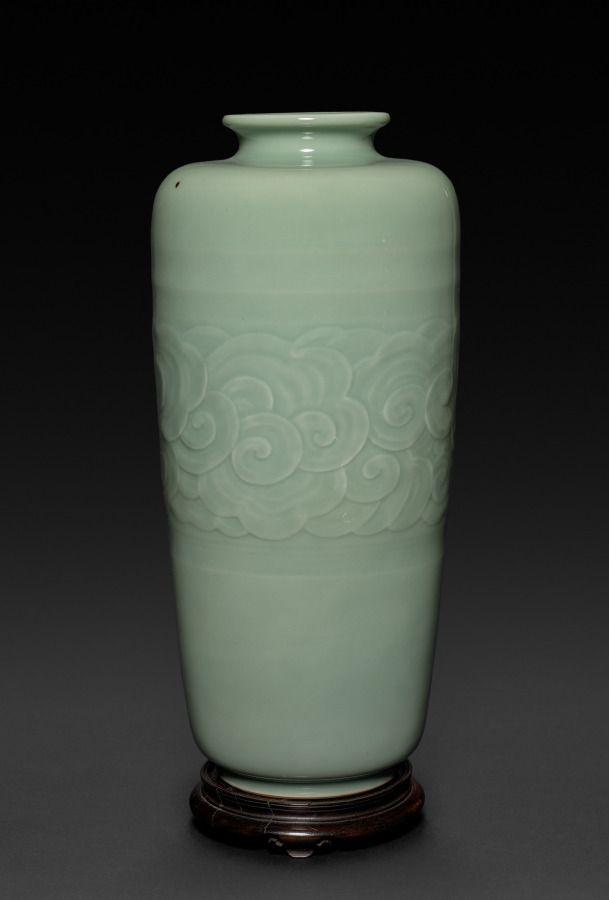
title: Tong-shaped Vase with Band of Cloud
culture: Japan, Meiji period (1868–1912)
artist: Seifū Yohei III (Japanese, 1851–1914)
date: 1893–1914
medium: Porcelain with molded and carved design and green glaze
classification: Ceramic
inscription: 清風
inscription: 帝室技芸員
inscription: 金聲玉振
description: Many of the vases created by Yohei III and IV were made with reference to and in emulation of Chinese ceramics in both form and glazing. The vessel type called tongping, pronounced tōbin in Japanese, is tall and cylindrical, like the thick length of bamboo referenced in the shape of the ideograph tong 筒. Unlike the ancient gu, hu, and guan, this form did not emerge in China until the Ming dynasty, and many such vases date to the early Qing dynasty. Two green-glazed vases, this one by Yohei III and the other by Yohei IV CMA 2022.228, are interpretations of this form. Yohei III’s version has slightly hunched shoulders and is somewhat wider at the top below the small neck and lip. Yohei IV’s vase is more angular. The wide rack of molded cloud encircling the Yohei III vase rises subtly from very low relief banding above and below it, accentuating the vessel’s rounded edges and complementing the form. In contrast, the allover flower vine pattern on the body and “seven treasures” pattern at the collar of the vase by Yohei IV evokes a garment’s cuffed sleeve, like the common English appellation for this type of vessel—“sleeve vase.”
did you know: Seifū Yohei III mined the repertoire of Chinese vessel types, from ceramics modeled after ancient ritual bronzes to shapes developed in the Yuan (1279–1368) and Ming (1368–1644) dynasties.